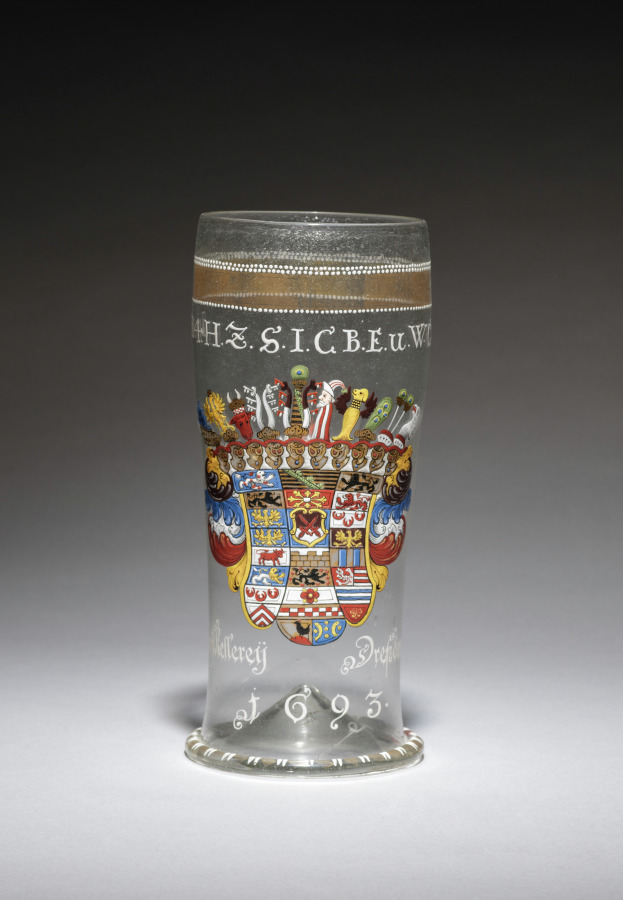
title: Beaker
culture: Germany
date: 1693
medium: enameled glass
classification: Glass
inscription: I[ohann] G[eorg] D[er] 4 H[erzog] z[u] s[achsen] I[ulich] c[leve] B[erg] E[ngern] U[nd] W[estphalia] c[hurfürst]. Below the arms of the duke, in white enamel is the inscription: HOFFKELLEREY, DRESZDEN.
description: This humpen was made for the court cellar (Hofkellerei), Dresden, which belonged to the House of Saxony, showing the arms of Johann IV zu Sachsen.